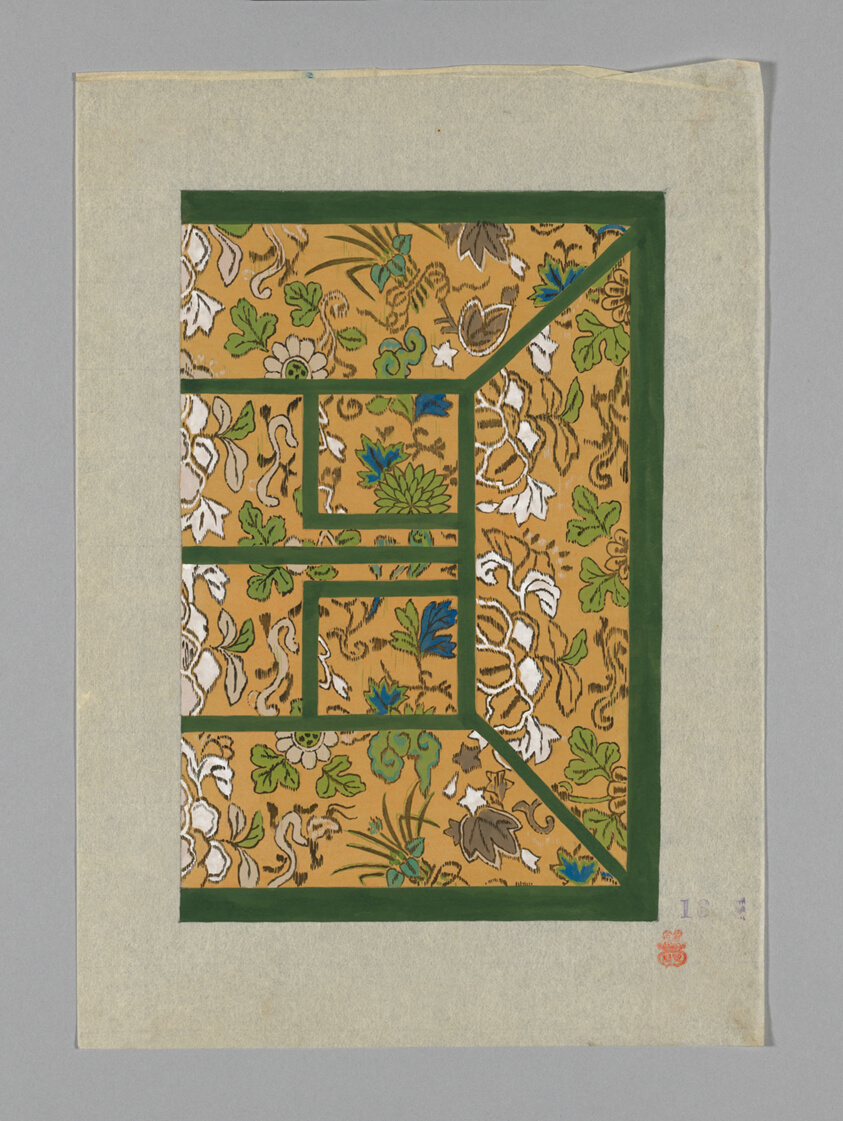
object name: Drawing and Watercolor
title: Design on Paper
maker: Japan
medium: Paper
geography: Japan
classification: textile; accessory - paper design; watercolor; paper